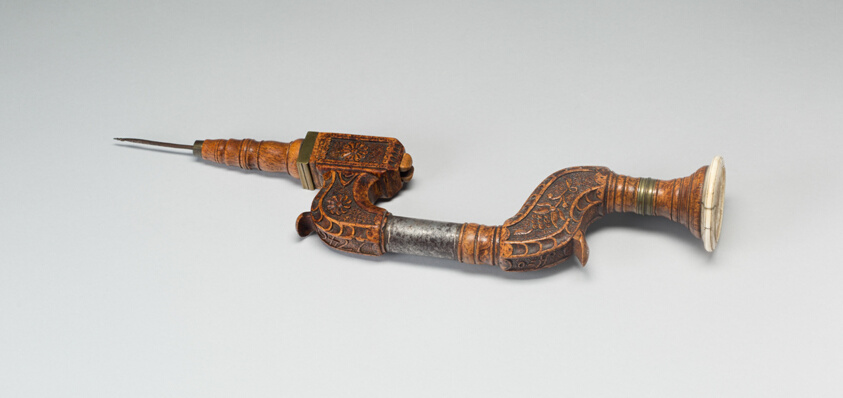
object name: Metalwork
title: Borer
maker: Germany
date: 1746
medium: Wood, brass, and ivory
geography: Germany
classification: tool; european decorative arts; metalwork